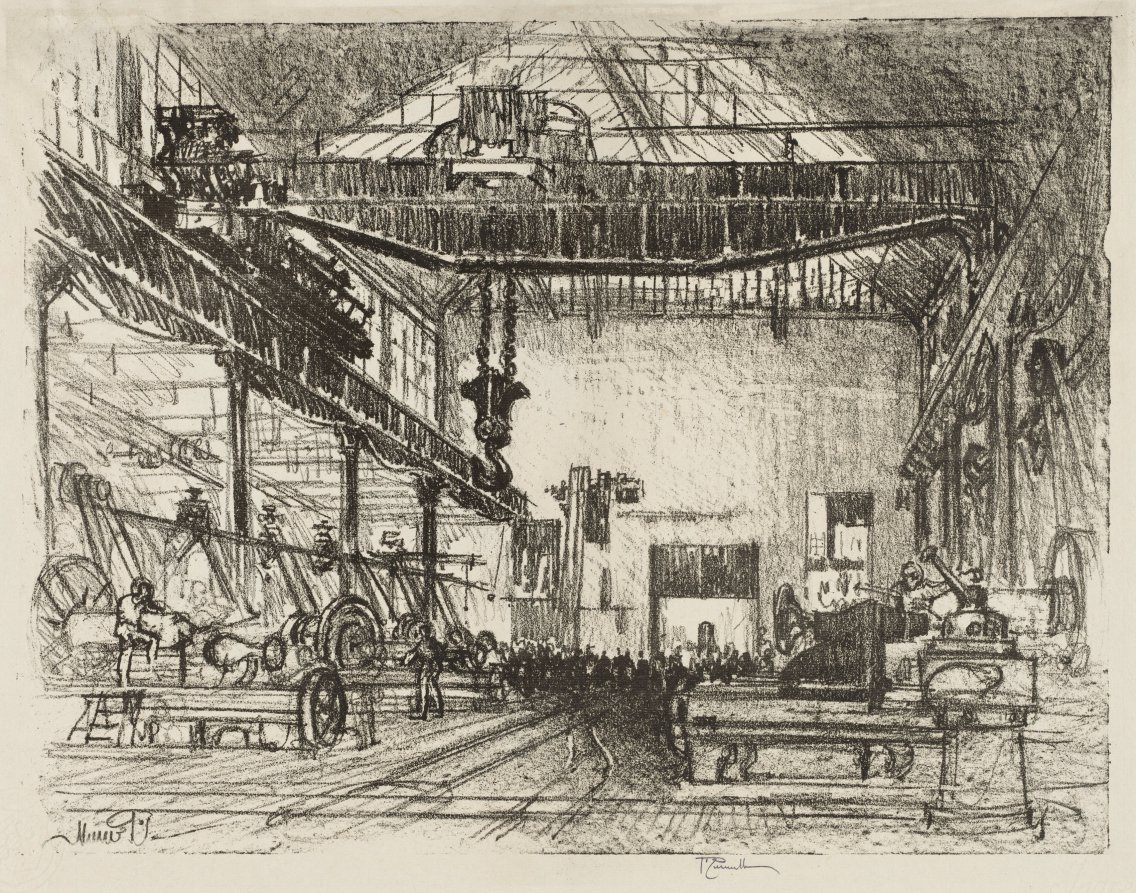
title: English War Work: Planing Big Shells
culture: America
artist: Joseph Pennell (American, 1857–1926)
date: 1916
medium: lithograph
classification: Print